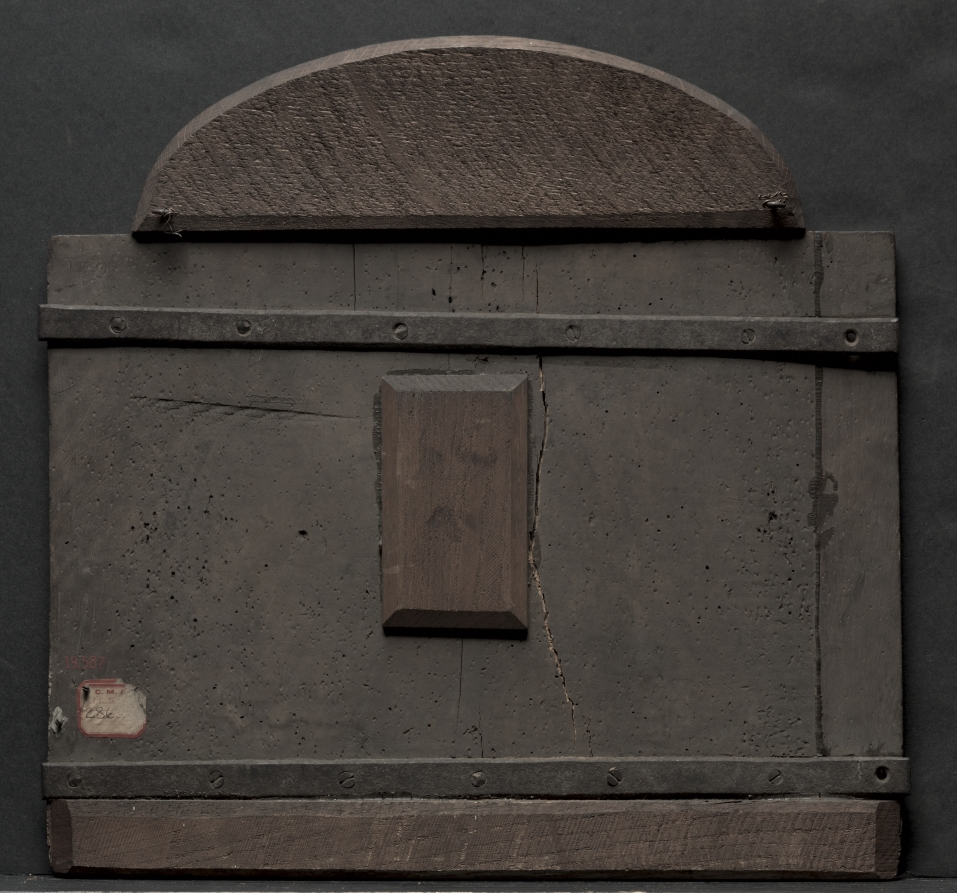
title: Carved Wood Panel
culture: France, 18th century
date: 1700s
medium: wood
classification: Furniture and woodwork